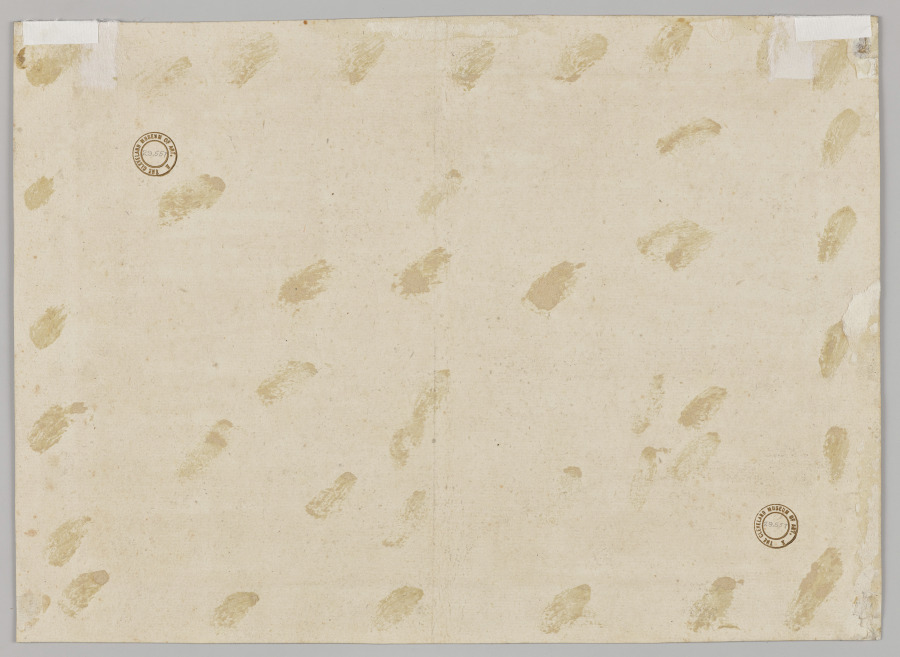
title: Saint Jerome in a Landscape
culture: Italy, 16th century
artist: Domenico Campagnola (Italian, 1500–1564)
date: c. 1530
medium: pen and brown ink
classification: Drawing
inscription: RECTO OF MOUNT, lower left, in graphite: 61 [6 crossed out, 1 underlined] / 236 [underlined] ; lower center, in graphite: Titian [inscribed in a cartouche] ; lower center, in graphite: 3 ; lower right, in graphite: 8930 [erased] ; lower right, in graphite: [illegible]/q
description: Domenico Campagnola helped to establish a specialized collector’s market for landscape drawings, building upon the legacy of his father, Giulio Campagnola, and Titian. Like Titian, Domenico’s works emphasize God’s power as expressed through the natural world. Hermit Saint Jerome, at lower left, sits in spiritual contemplation within a dynamic landscape rendered with Domenico’s distinctive linear style, complete with rustic houses, humble tree groves, and grand distant vistas. Independent drawings (drawings made as works of art in and of themselves) were a new category of drawing advanced by Domenico and others.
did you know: Domenico Campagnola was one of the first artists in Renaissance Italy to create drawings such as this as ends in themselves rather than as preparatory studies.